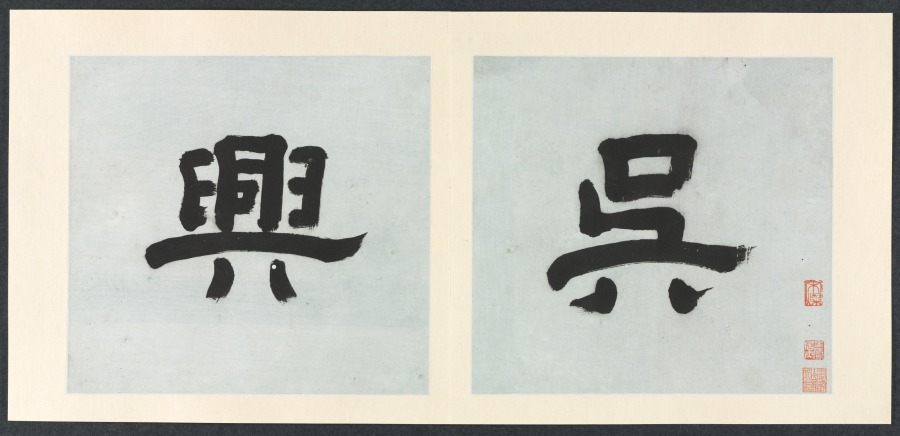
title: Eighteen Views of Huzhou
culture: China, Ming dynasty (1368–1644), Wanli reign (1573–1620)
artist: Song Xu (Chinese, 1525-c. 1606)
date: c. 1588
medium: Album of eighteen leaves; ink and color on silk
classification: Painting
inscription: 包陽湖：自此數里，東出太湖甚近。北至香山可數里。過此即宜興界矣。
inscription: 呂山滙：蓋呂蒙曾屋此而云然。亦弁山餘派也，入郡中必由此。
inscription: 道場山：郡城南去，可五六里，為伏虎禪師道場。上有伏虎亭、望湖亭。南可見武林諸山。北盡震澤群峯之勝。俯窺城郭樓臺，佳麗如畫。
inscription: 碧巖山：山多古木，寺藏其中。今為人侵伐殆盡，遂成荒廢，遊者鮮矣。然嶺崖飛瀑，不減清致。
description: By the 1500s, visits to historic and scenic sites in the lower Yangzi delta stimulated an increase of printed illustrated travel books. Topographical depictions of local scenery flourished. Leaves from this album illustrates sites around Lake Tai of the two adjacent counties Changxing and Wuxing (modern Huzhou). Song Xu, who lived intermittently in Jiaxing and Songjiang, must have passed through Wuxing by boat and thus knew the region. The paintings are inscribed with gazetteerlike notations, suggesting that the album was produced for clients as commemorative works, a travel guide, or for “armchair travel” (woyou) in one’s mind.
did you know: Song Xu favored a painting style that was technically polished and focused attention on specific, realistic details.